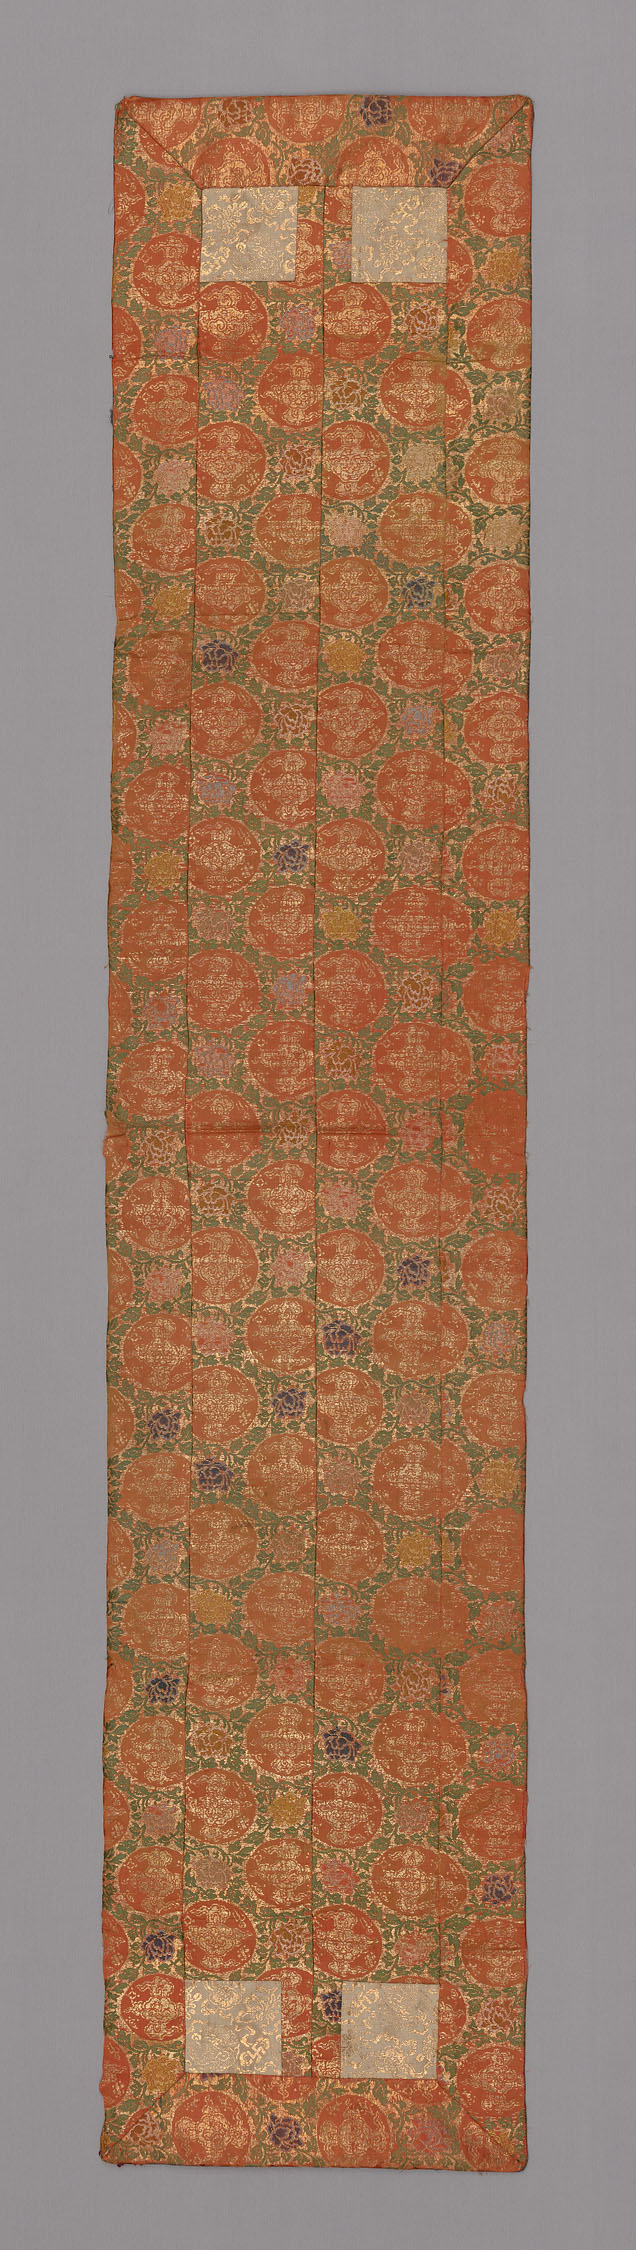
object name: Textile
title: Ôhi (Stole)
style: Japanism, late edo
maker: Japan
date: Edo period (1615–1868), 1775/1825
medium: Silk and gold-leaf-over-lacquered-paper-strip, warp-float faced 4:1 satin weave with supplementary brocading wefts bound in weft-float faced 1:4 'Z' twill interlacings; patches: silk and gold-leaf-over-lacquered-paper-strip, warp-float faced 2:1 'Z' twill weave with weft-float faced 1:2 'Z' twill interlacings of secondary binding warps and supplementary patterning wefts; lined with silk, plain weave self-patterned by main warp and ground weft floats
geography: Japan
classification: textile; weaving